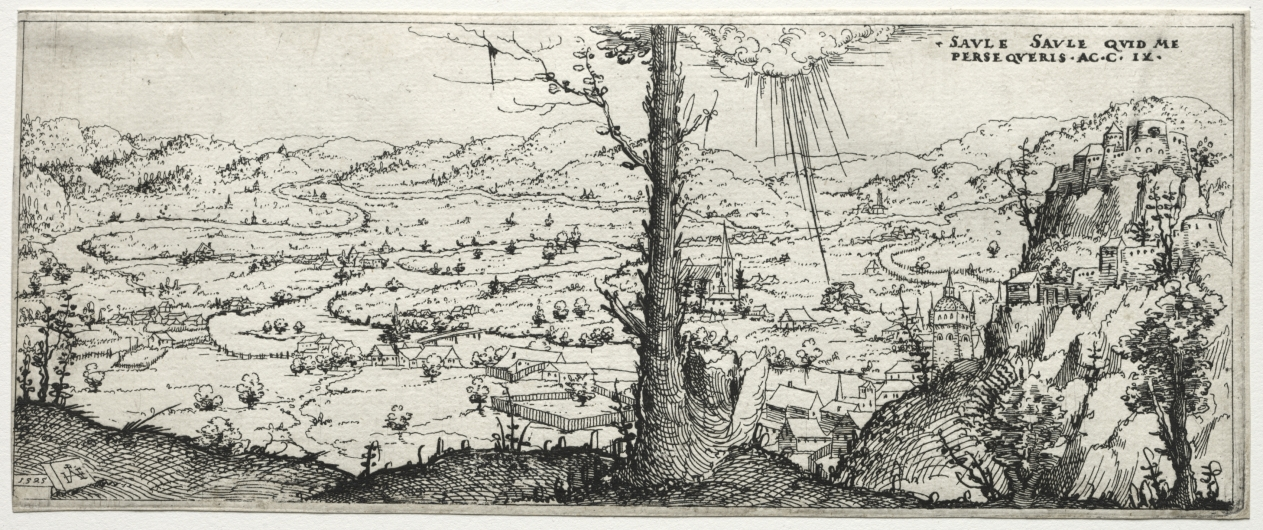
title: Landscape with the conversion of saulus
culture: Germany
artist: Augustin Hirschvogel (German, 1503–1553)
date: 1545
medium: etching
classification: Print